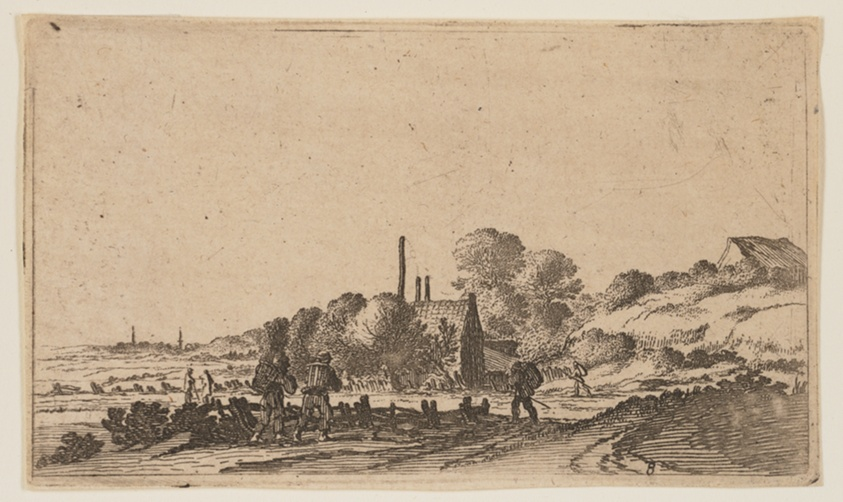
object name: Print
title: Figures on a Path before Farms on the Dunes, from Twelve Landscapes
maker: Gillis van Scheyndel (Dutch, 1595–1660)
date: c. 1605-1650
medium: Etching on ivory laid paper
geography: Netherlands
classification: etching; paper; print; prints and drawing